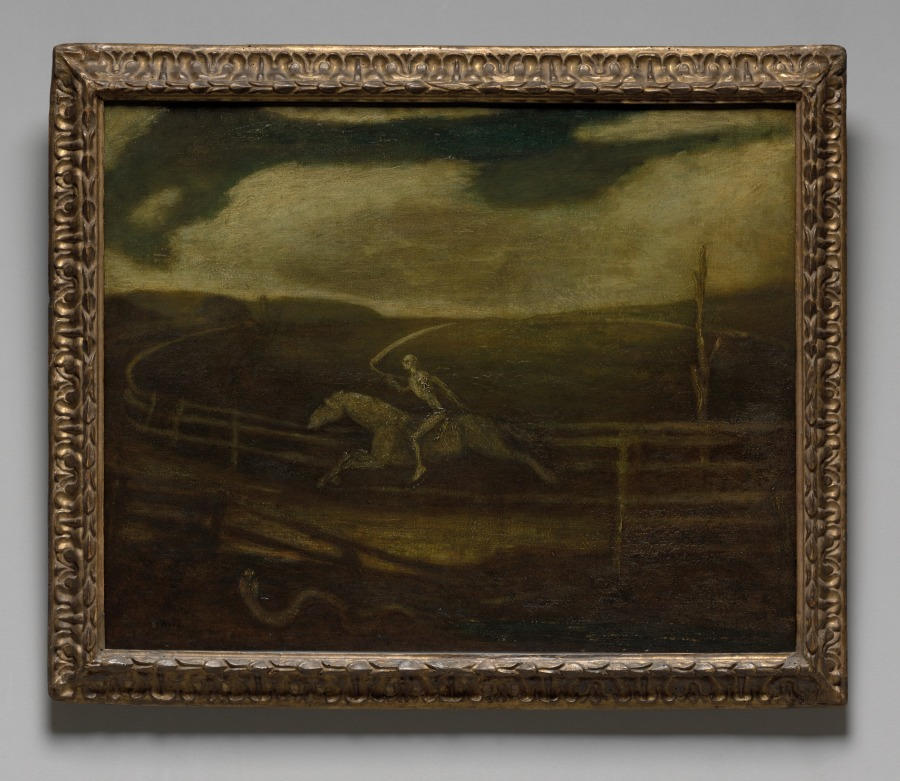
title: The Race Track (Death on a Pale Horse)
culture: America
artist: Albert Pinkham Ryder (American, 1847–1917)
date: c. 1896–1908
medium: oil on canvas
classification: Painting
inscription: Signed lower left: "A. P. Ryder"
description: Ryder’s subject was inspired by a horse race that took place in New York during 1888. One of the artist’s friends wagered $500 on the race and then died by suicide after the horse lost. Medieval symbolism infuses the composition: death appears as a skeleton on horseback holding a scythe with which he cuts down the living, while a snake—a sign of temptation and evil—slithers in the foreground. An intense man, Ryder worked on the painting for several years and was deeply reluctant to part with it.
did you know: Counterclockwise horse racing in the United States was not standardized until the 1920s.